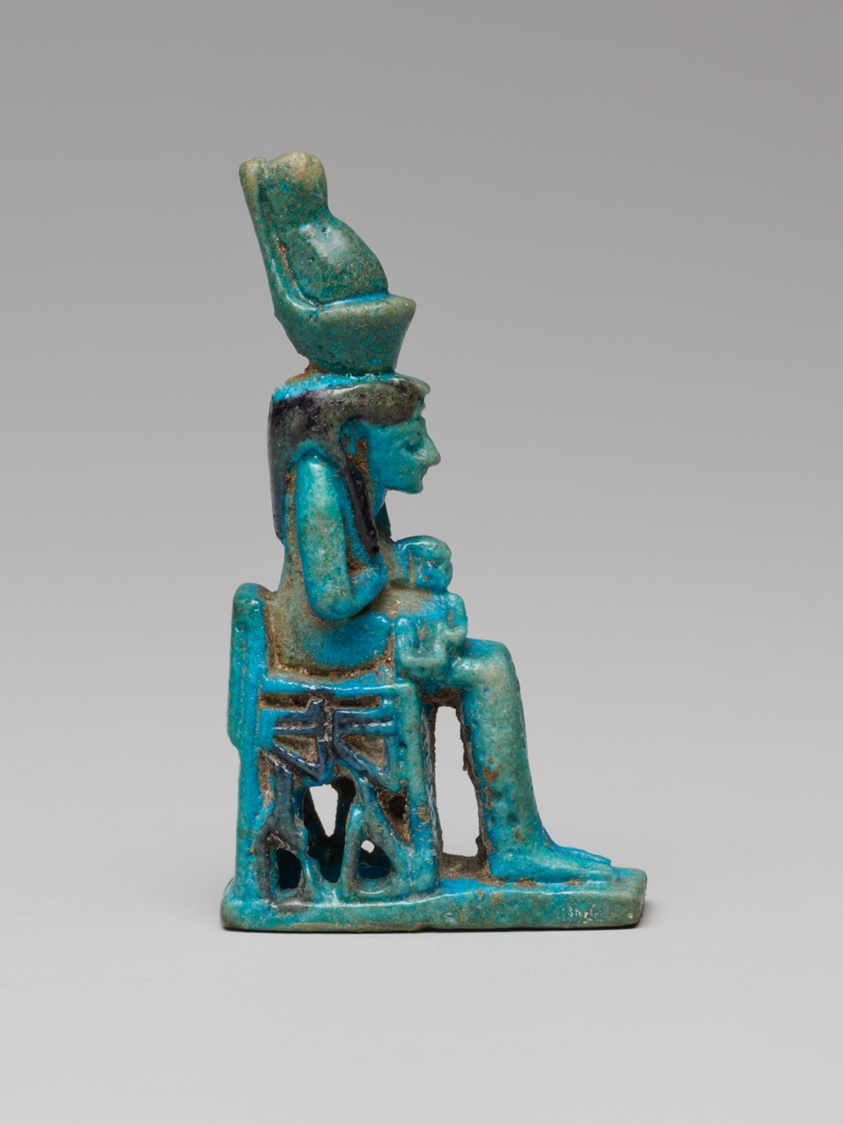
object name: Costume and Accessories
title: Amulet of Mut and Khonsu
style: third intermediate period, late period (egyptian), egyptian, ancient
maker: Egyptian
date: Third Intermediate Period (about 1069–664 BCE)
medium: Faience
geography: Egypt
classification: amulet; jewelry; ceramics; ancient art; costume; faïence (composite material)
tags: goddesses, children, gods (deities), nursing (breast feeding)